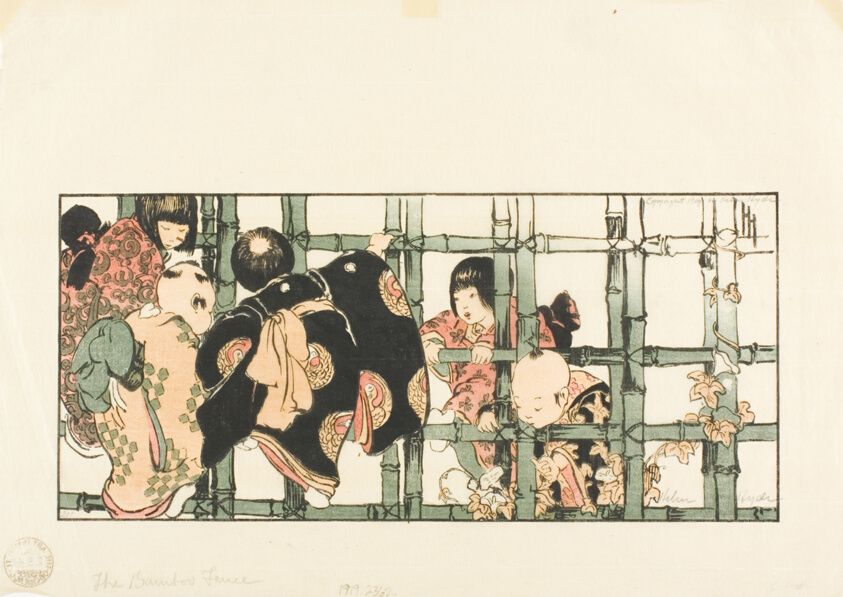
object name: Print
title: The Bamboo Fence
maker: Helen Hyde (American, 1868-1919)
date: 1904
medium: Color woodcut on cream Japanese paper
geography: United States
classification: woodcut; print; prints and drawing